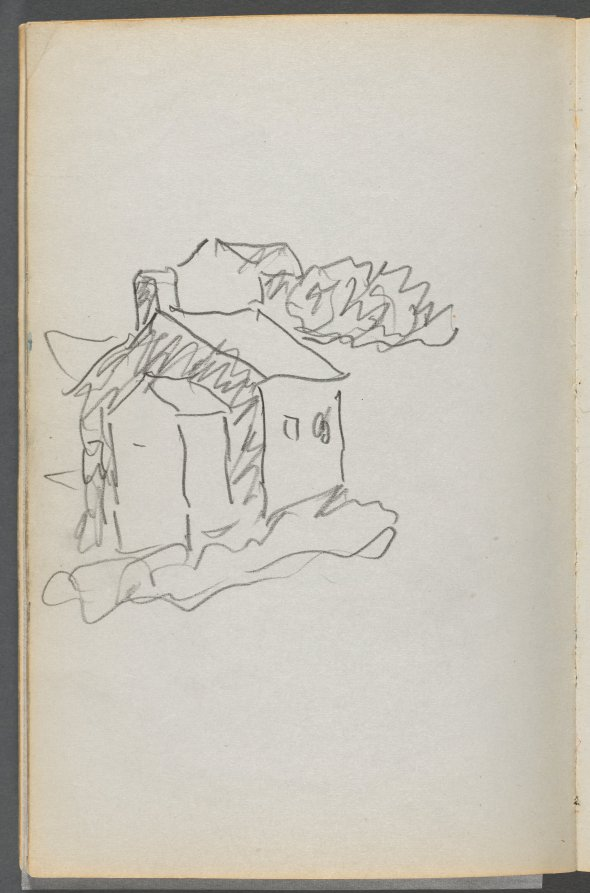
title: Sketchbook, The Dells, N° 127, page 046: House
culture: America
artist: Maurice Prendergast (American, born Newfoundland [now Canada], 1858–1924)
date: c. 1919–1921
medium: graphite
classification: Bound Volume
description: This sketchbook contains 59 pages of graphite drawings and 16 watercolors made at various locations on Cape Ann, Massachusetts.